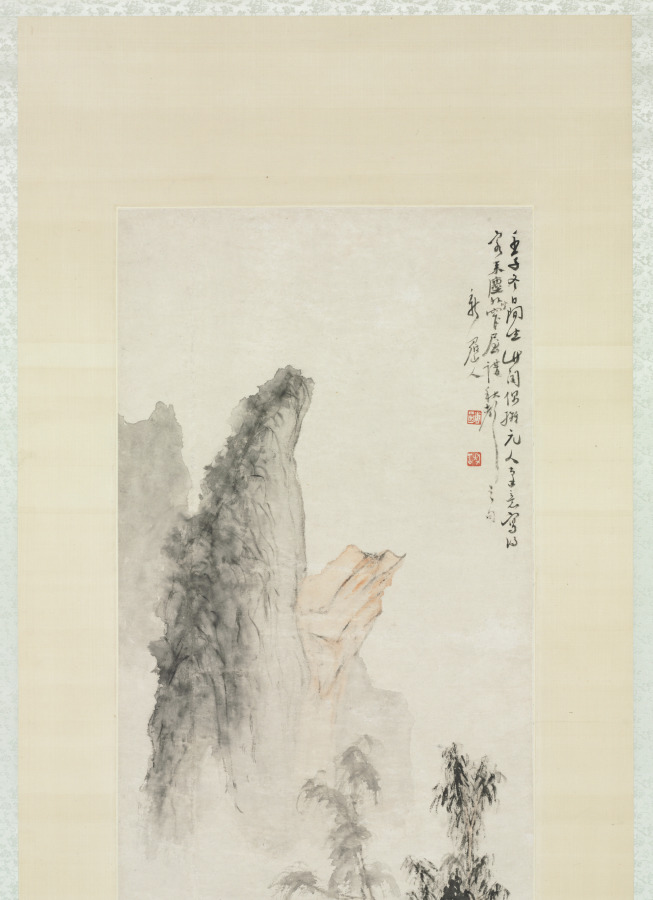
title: Conversation in Autumn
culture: China, Qing dynasty (1644-1911)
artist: Hua Yan (Chinese, 1682–c. 1765)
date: 1732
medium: Hanging scroll; ink and light color on paper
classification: Painting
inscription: Artist's inscription, signature, and 2 seals: On a winter day in the renzi year [1732], while leisurely sitting in my mountain pavilion, I happened to have imitated the brush style of Yuan masters on the two verses: "A guest came from the dusty world for a visit; in the small cottage we talked about the sound of autumn." Xin luo shan ren 新羅山人 [seals] Hua Yan 華喦; Qiuyue 秋岳.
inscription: 1 colophon and 2 seals of Zhang Tingji 張廷濟 (1768–1848): Old Hua [Yan], in this painting, was able to evoke the mood of desolation in nature and match the poetry elegantly. If Fangweng [Lu You 陸游 (1125–1210)] saw this, he would inscribe the painting with two words "idyllic world 詩境."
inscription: 新羅山人為吾鄉老輩，擅長寫生。羅致羽族，翫其飛鳴飲啄。故所作別有生趣。山水不多。作客冬在西泠，見所白雲松舎圖。空靈曠逸，得未曾有，至今憶之。兹幅以蒼秀勝，荒寒之中，復饒逸趣。如坐我鵠灣、龍瀃間矣。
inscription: 1 colophon and 1 seal of Zhu Angzhi 朱昂之 (1764–1841): The highest achievement in the art of painting is to penetrate deeply into the chamber of old masters, but at the same time transcend the bounds of conventional rules. This painting of Xinluo is derived from [the style of] Baishi (Shen Zhou 沈周, 1427–1509) and Baoshan (Lu Zhi 陸治, 1496–1576) with splashed-ink technique of Wang Qia 王洽 (Wang Mo 王默, ?–805), in addition to his own innovative ideas. Hence the distinctive style. Truly, he is one of those who passed through the net of the Six Canons [of Xie He 謝赫, 479–502]; treasure it.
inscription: 2 seals of Ye Tingguan 葉廷琯 (b. 1791); 1 seal unidentified.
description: Two figures sit conversing in a thatched cottage. This painting illustrates two poetic lines: My guest came to sit beyond the dust, In a narrow room, we talked about the autumnal sounds of autumn. Hua Yan presented an intimate world—simple and rustic—amid a landscape. The cool wilderness depicted in this work conveys an aloofness that may reveal the inner world of a scholar-artist who failed the civil service examination but preserved a sense of pride and endurance in his humble surroundings.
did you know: A barren tree on the lower left has a hole in its lower trunk through which is visible a young servant carrying food to the gentlemen in the cottage.